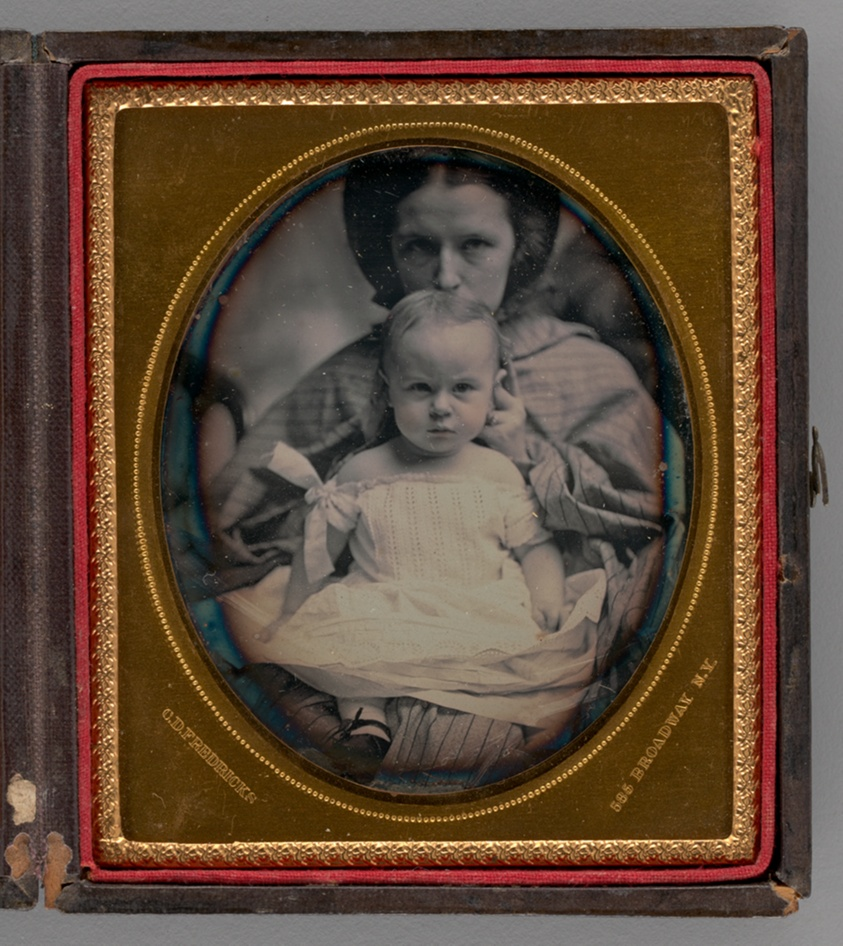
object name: Photograph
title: Untitled (Portrait of a Woman holding a Child)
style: 19th century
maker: Charles DeForest Fredricks; American, 1823-1894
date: 1858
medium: Daguerreotype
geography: United States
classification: portrait; photograph; photographic process; photography; portrait; daguerreotype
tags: lundberg collection, portrait, mother and child, family, families, babies, portraits, portraits: child subject, portraits: female subject